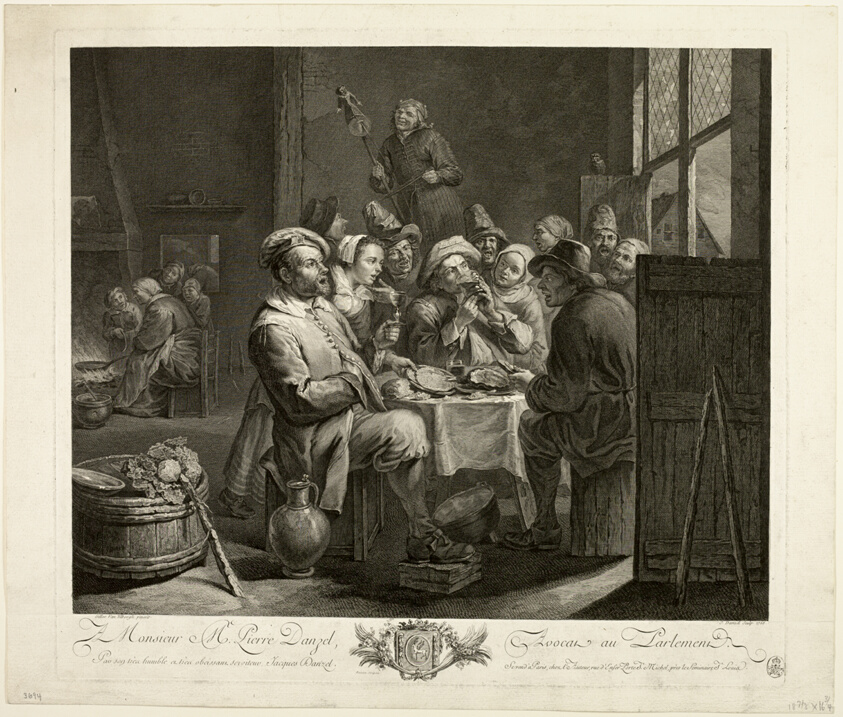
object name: Print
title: The King Drinks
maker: Jacques Claude Danzel (French, 1737-1809); after Gillis Van Tilborgh, the Younger (Flemish, c. 1625-c. 1678); coat of arms etched by Baisiez (French, active in 1764 and 1768)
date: 1766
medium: Etching with engraving on ivory laid paper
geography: France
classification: engraving; print; prints and drawing